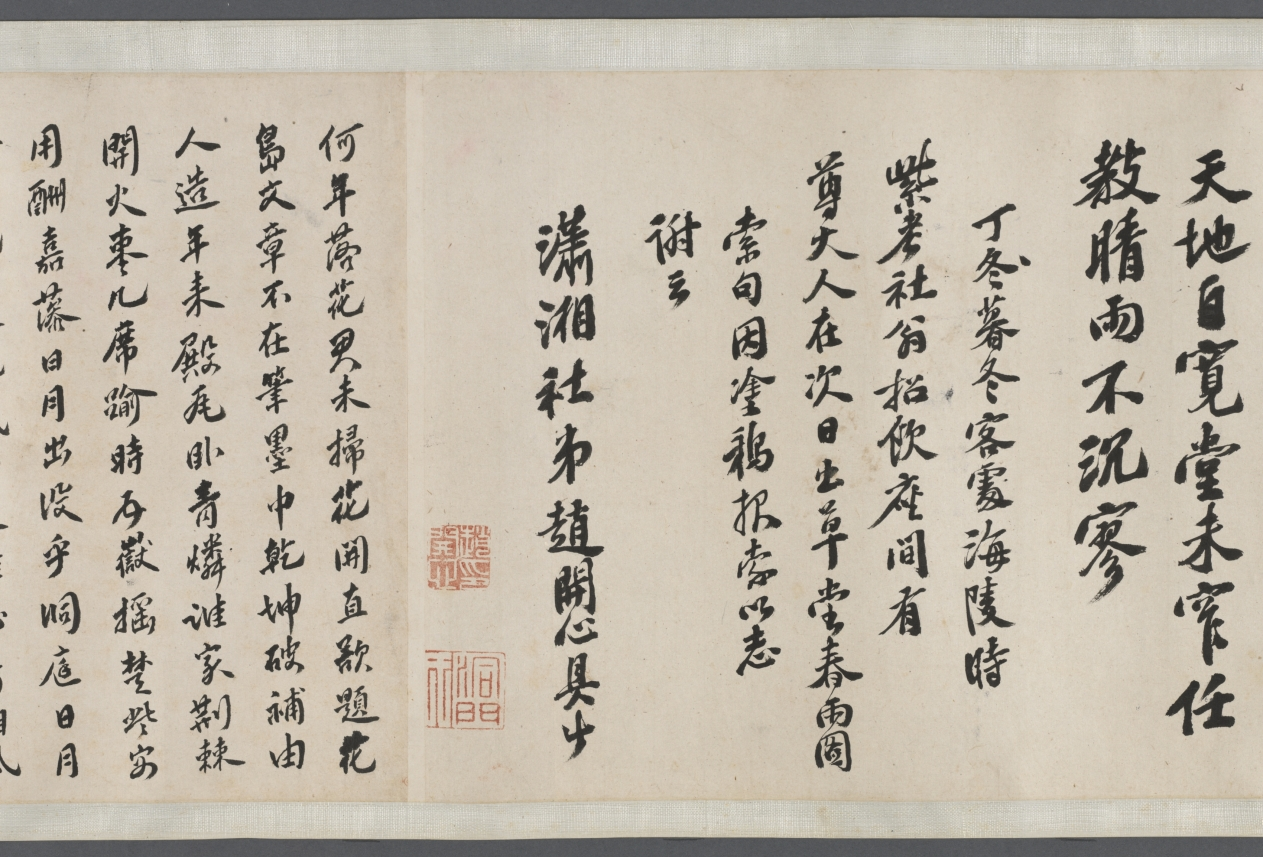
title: Spring Rain Thatched Hut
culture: China, Qing dynasty (1644-1911)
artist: Wang Jianzhang (Chinese, active 1621–1662)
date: 1650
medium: handscroll, ink on paper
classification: Drawing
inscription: Title by Wu Zhiying 吳芝瑛 (1868–1933), dated 1910.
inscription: 春雨草堂圖。庚寅仲春，為紫玄社兄畫於若耶溪上。 仲初王建章。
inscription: 12 colophons by Gong Weiliu’s 宮偉鏐 (1611–1680) contemporaries: Fang Gongqian 方拱乾 (1596–1667, jinshi of 1628); Jiang Cai 姜埰 (1607–1673); Liang Yizhang 梁以樟 (1608–1665); Du Shaokai 杜紹凱 (also named Du Jie 杜岕, 1617–after 1689), dated 1648; Zhao Kaixin 趙開心 (d. 1663), dated 1647; Zhao Erbian 趙而忭 (d. 1658); Yu Yaoguang 余耀光, dated 1649; Yao Quan 姚佺, dated 1648; Chen Taisun 陳台孫 (b. 1611, jinshi of 1640); (Monk) Shao 韶; Du Zhujin 杜祝進; and Tang Shi 唐時.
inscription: 此研田莊居士王建章為先太史紫元公所作春雨草堂圖也。居士字仲初，明崇禎間人，與先太史及惲香山相友善。喜畫佛像，自謂不讓李公麟。山水祖述董源，筆力雄健，有不可羈勒之概。香山稱其墨有五采，非世人所知。然性廉重，非同志不輕落筆，人得其寸圖尺縑，必相與忻賞，如獲蜼彝兕敦，非人世間物也！見先太史筆記，此圖寫雨景，而氣韻生動，勃勃於不能止。每一展覽，覺滿紙雲烟，墨瀋猶濕，如寫吾先人胸中未盡之邱壑也。圖後題詠，多一時名手，想見文采風流之盛。迄今二百餘年，舊德先疇，遺風未沫。吾子孫其永寶之，如與吾先人接謦咳於一堂，為感思之助，其敢作圖畫觀乎！同時香山亦有圖佚去己久，不知異日能為延津之合否。壬申長夏本昂重裝敬識。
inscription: Collectors' seals including: Gong Ben'ang 宮本昂 (1821–1874); Lian Qian 廉泉 (1868–1932); Wu Zhiying 吳芝瑛 (1868–1933)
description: With its striking simplicity, this painting captures the pure serenity of a private garden in the moist atmosphere of a spring morning on a small river. Painted in the style of Ni Zan, Wang Jianzhang dedicated this work to his patron-friend Gong Weiliu (1611-1680). Gong retired from government service after the fall of the Ming dynasty and constructed a garden-retreat at his native home in Taizhou, Jiangsu province. He invited scholars and poets from his literary society to contribute writings of his estate, which are here mounted together with the painting in this scroll.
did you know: Gong Weiliu, the owner of the estate portrayed here, had received his prestigious jinshi degree in 1643, but his official career was thwarted by the collapse of the Ming dynasty the following year.